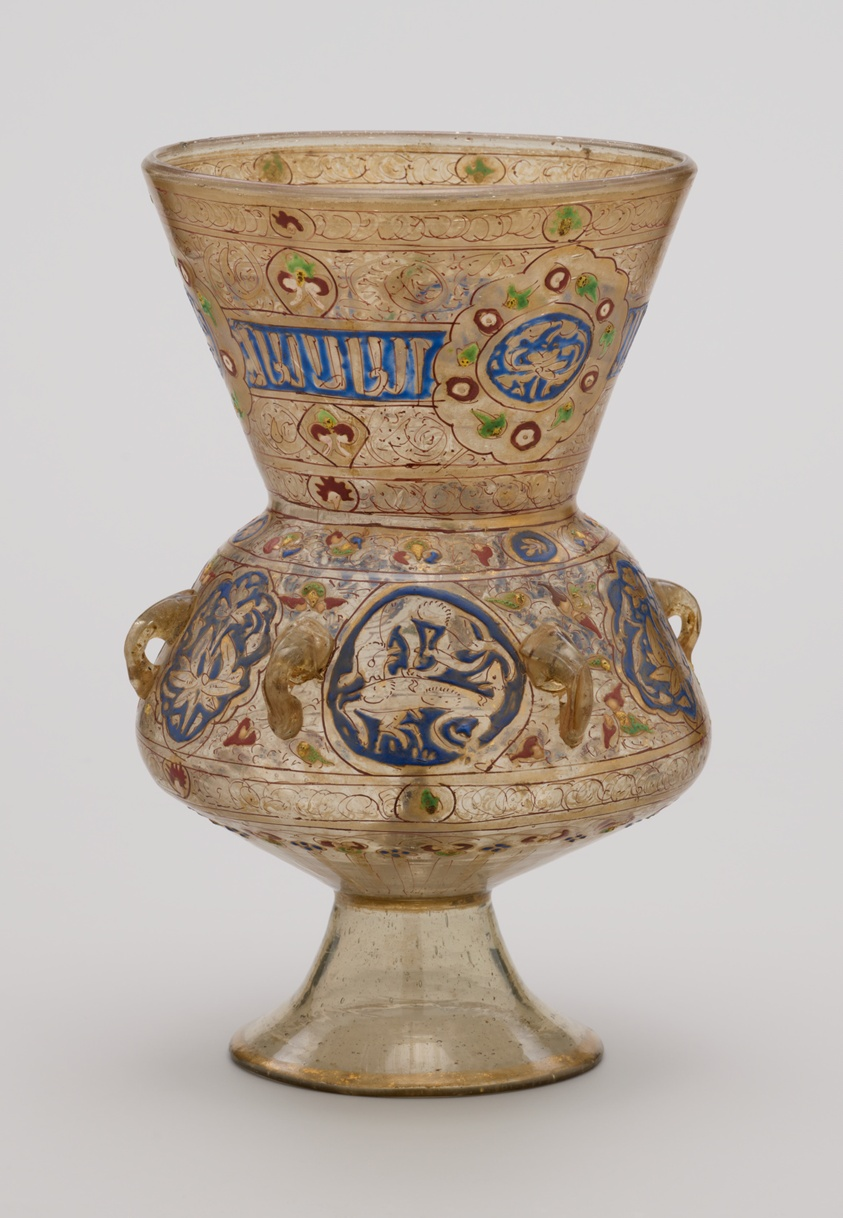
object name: Glass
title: Lamp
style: Islamic (culture or style)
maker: Syria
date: Mamluk dynasty (1250-1517), 14th century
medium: Blown glass with polychrome enamels and gilding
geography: Egypt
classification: glass; asian art; lamp (lighting device); decorative arts